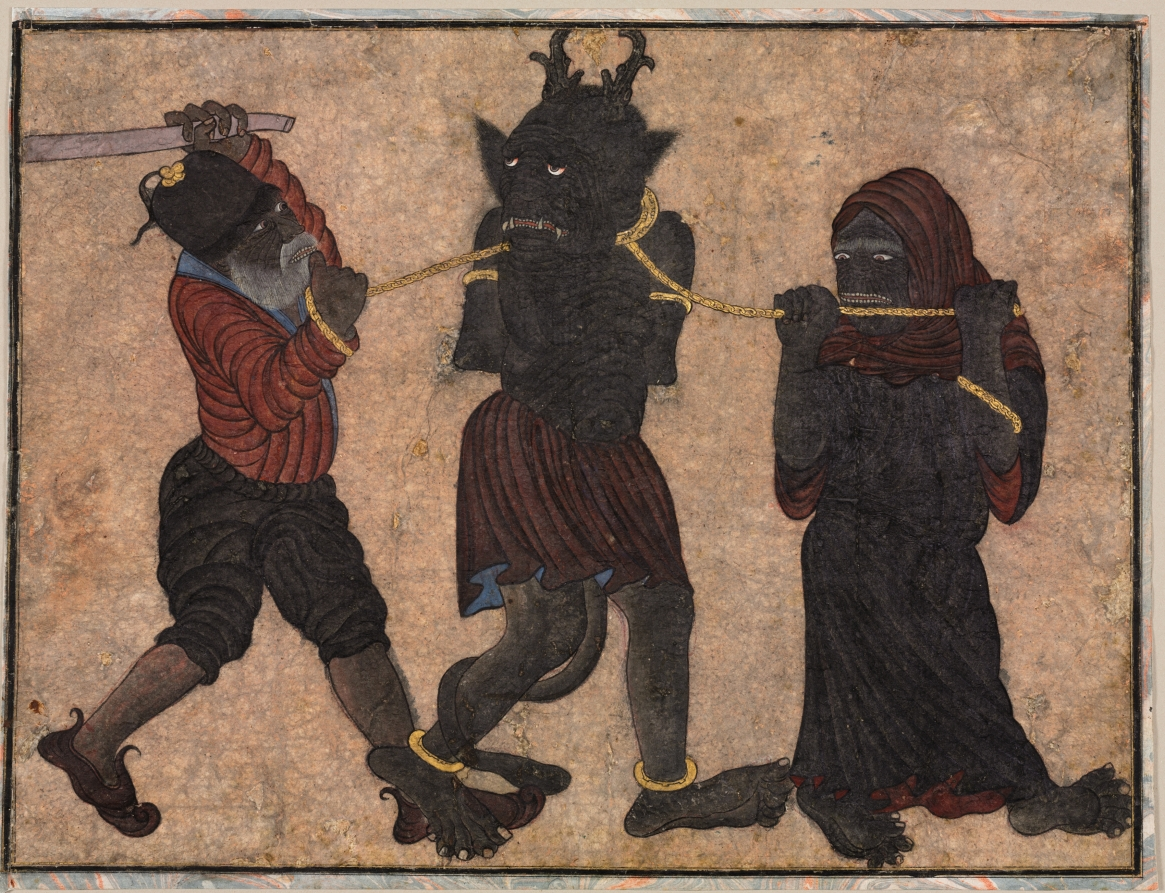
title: Demon in chains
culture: Iran or Central Asia, Timurid or Turkoman Period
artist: style of Muhammad Siya Qalam (Iranian)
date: c. 1453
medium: opaque watercolor and gold on paper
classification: Manuscript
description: This page once belonged to a miscellany from the library of the early Ottonian sultans. It depicts two people in nomadic garb leading a demon, or Persian div, in chains between them. The female figure holding the chain to her face is painted to look nearly as ferocious as the captured div. The concept of divs as evil supernatural creatures of mysterious origin dates to pre-Islamic Persia, but they are also described in the text of the Qur'an. Divs in Persian literature and folktales are sometimes captured and forced to use their magic to serve a king or hero.